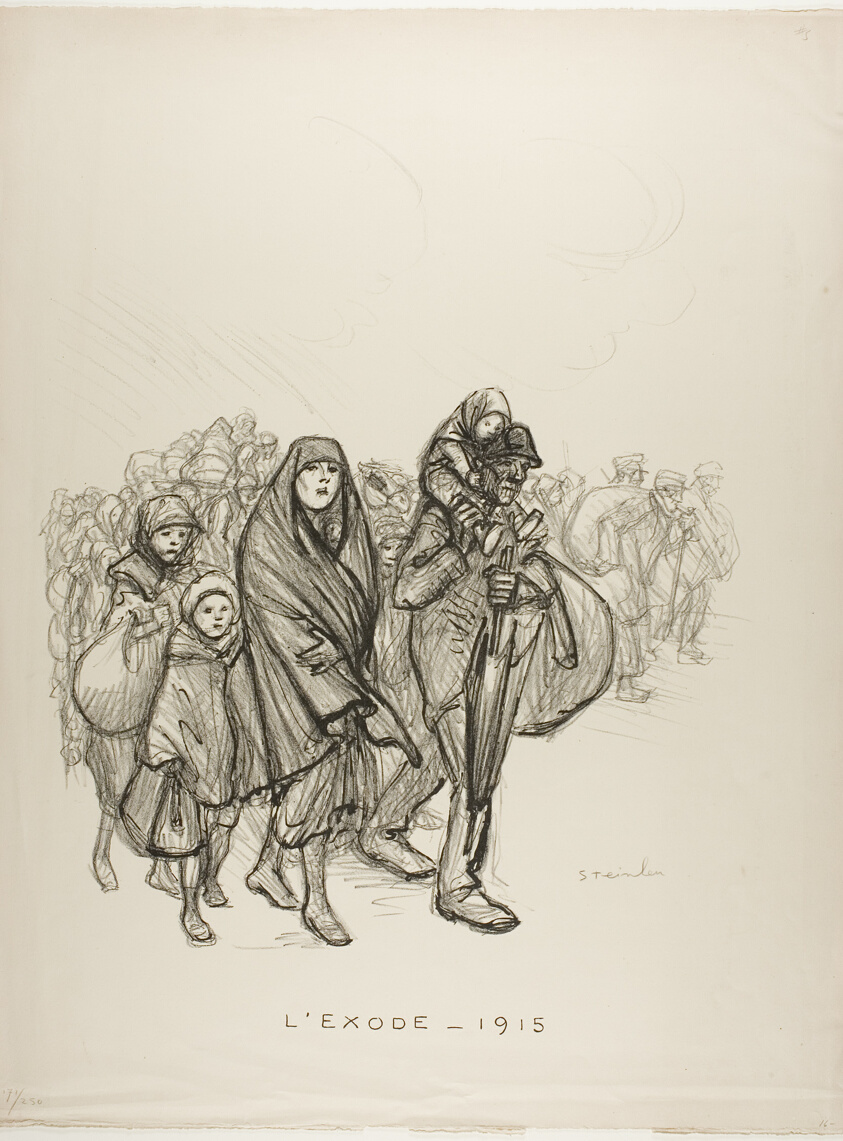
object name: Print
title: Exodus — 1915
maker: Théophile-Alexandre Steinlen; French, born Switzerland, 1859-1923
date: 1915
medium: Lithograph in black on ivory wove paper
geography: France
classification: lithograph; print; prints and drawing